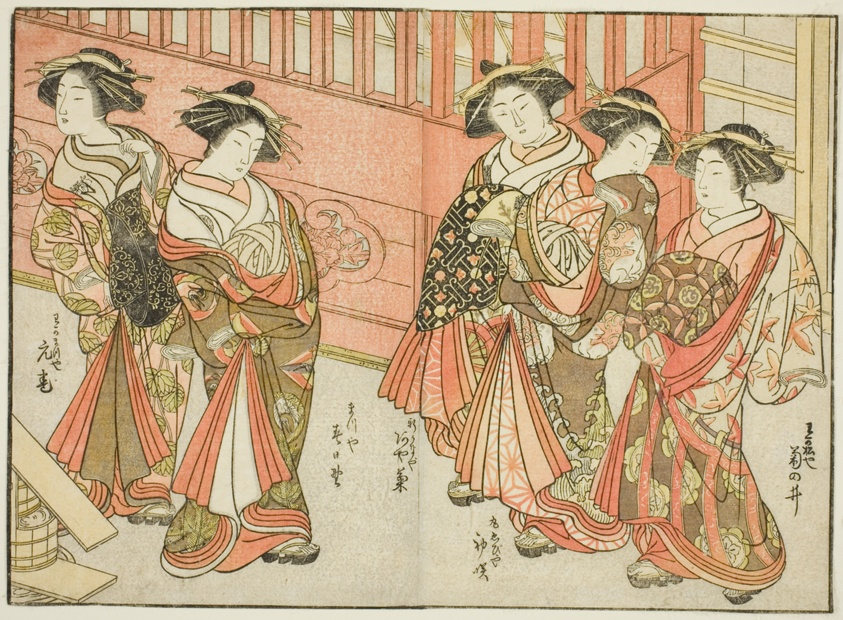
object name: Print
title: Five Courtesans of Various Houses, from the book "Mirror of Beautiful Women of the Pleasure Quarters (Seiro bijin awase sugata kagami)," vol. 3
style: Japanese (culture or style)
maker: Katsukawa Shunsho; Japanese, 1726-1792; Kitao Shigemasa; Japanese, 1739-1820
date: 1776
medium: Color woodblock print; double-page illustration cut from a book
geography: Japan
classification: woodblock print; print; asian art